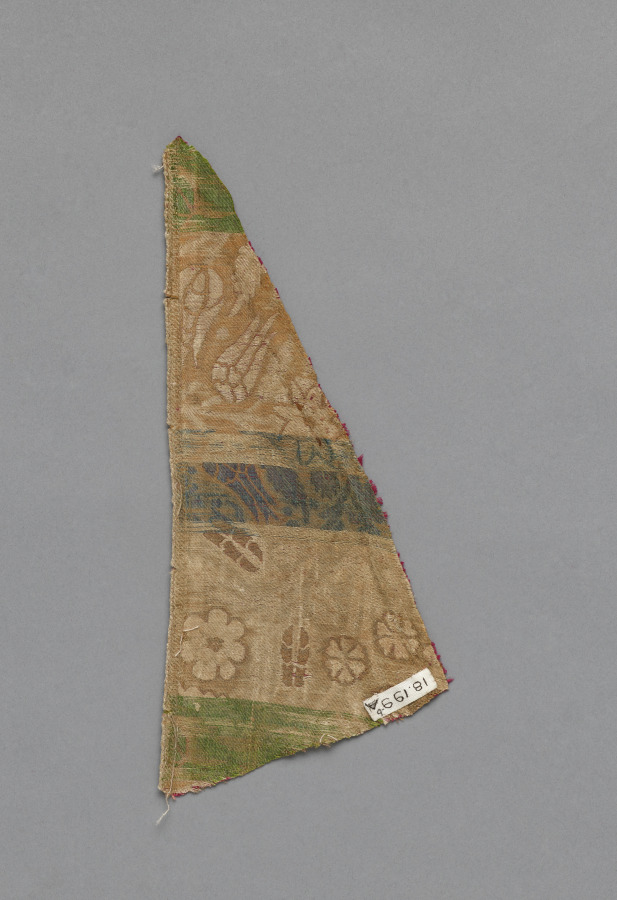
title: Textile Fragment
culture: Turkey, Bursa, 16th century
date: 16th century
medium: brocaded silk with metal thread weft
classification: Textile